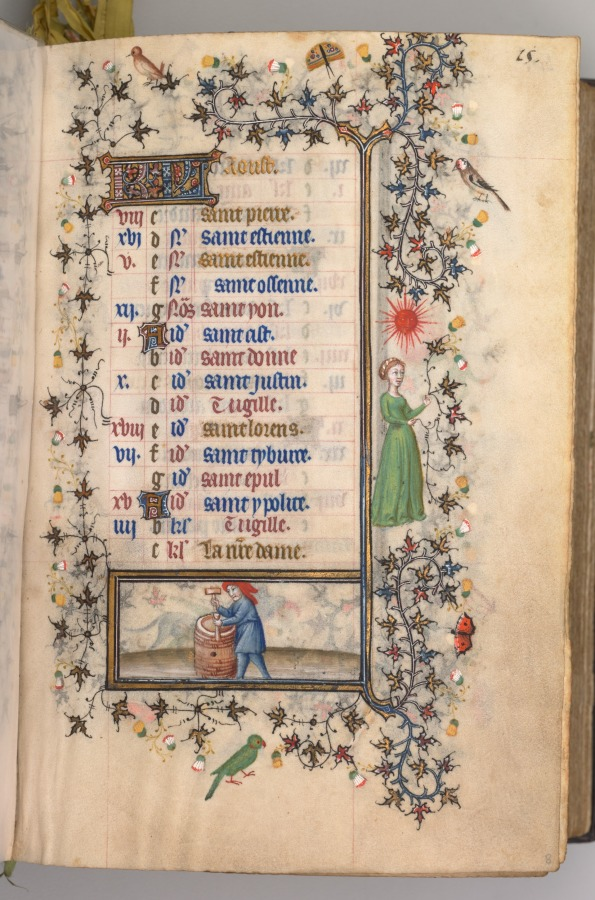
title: Hours of Charles the Noble, King of Navarre (1361-1425): fol. 8r, August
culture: France, Paris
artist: Master of the Brussels Initials and Associates (French)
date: c. 1405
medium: ink, tempera, and gold on vellum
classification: Bound Volume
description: This precious book was highly prized by its owner, Charles III, King of Navarre, a French-born prince whose coat of arms is painted on 20 folios. Charles visited Paris on numerous occasions and likely acquired this volume there in 1404. Paris was the center of the European book trade at the time and attracted illuminators from many parts of Europe. This manuscript represents one of the most remarkable fusions of French and Italian taste in book illumination. Though conforming to Parisian standards, most of the book’s major miniatures are the work of the Brussels Initials Master, an Italian illuminator who previously worked in Bologna and Padua.